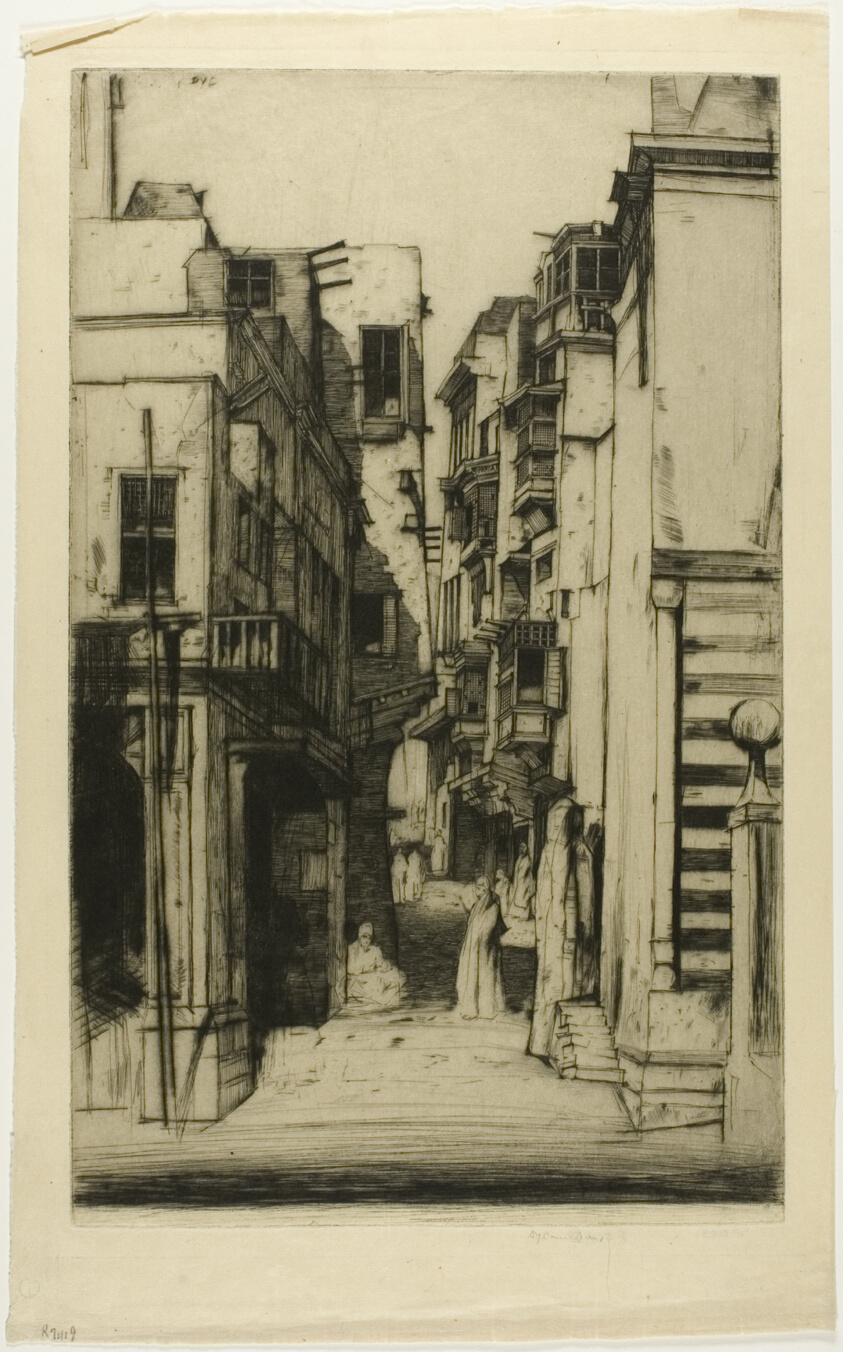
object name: Print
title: Street in Cairo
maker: David Young Cameron (Scottish, 1865-1945)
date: 1910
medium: Etching and drypoint on cream Japanese paper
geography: Scotland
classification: etching; print; prints and drawing